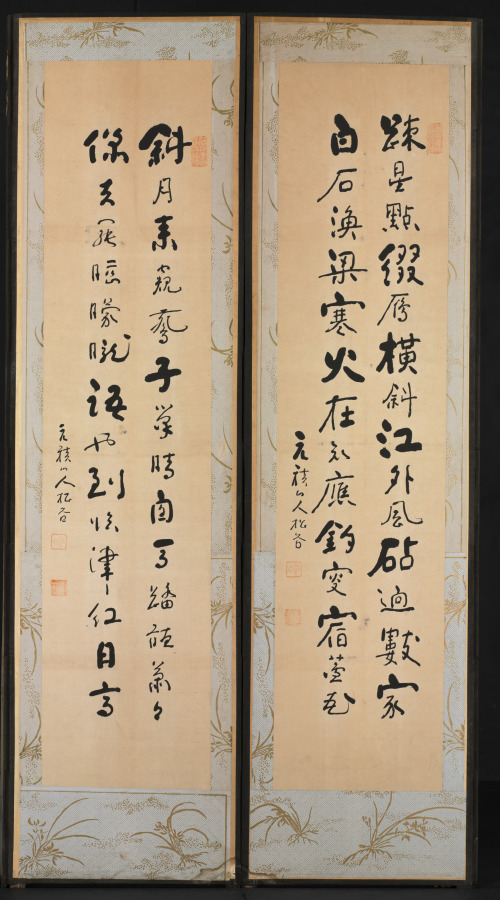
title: Calligraphy (reverse)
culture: Korea, Joseon dynasty (1392–1910)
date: late 1800s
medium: Ten-panel folding screen affixed with album leaves (obverse), calligraphy (reverse), ink and color on silk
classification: Painting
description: The front of this screen features an assortment of subjects: birds and flowers, landscapes, and scenes of everyday life, mostly in monochromatic ink with light colors. The screen’s reverse side conveys a number of classical poems about the fleeting beauty of the four seasons. Traditionally, only one side of a folding screen bears painted or embroidered images, since these were used as a background furnishing. In Korean houses by the 1800s and early 1900s, however, two-sided folding screens became noticeably popular, possibly inspired by Japanese double-sided folding screens, which mainly served as room dividers in Japanese households.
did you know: A calligrapher has brushed several Chinese poems about the four seasons on the reverse side, among them "Composing in the Daytime of Summer" by Tang poet Liu Zongyuan (773–819) and "Composing when Spring Begins" by Song scholar Zhang Shi (1133–1180).